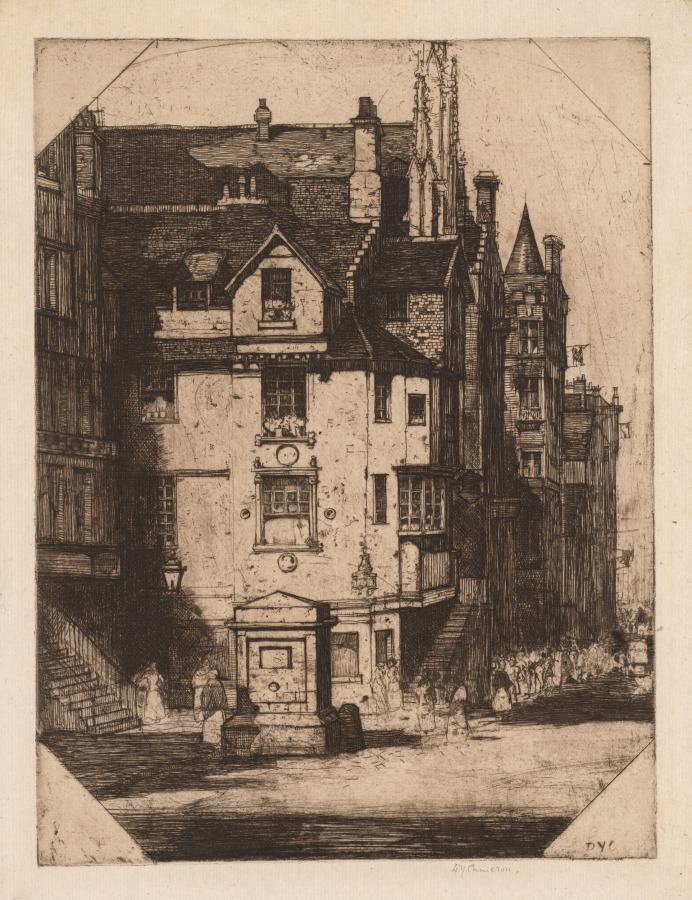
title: John Knox's House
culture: Britain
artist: David Young Cameron (British, 1865–1945)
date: 1905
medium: Etching and drypoint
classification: Print